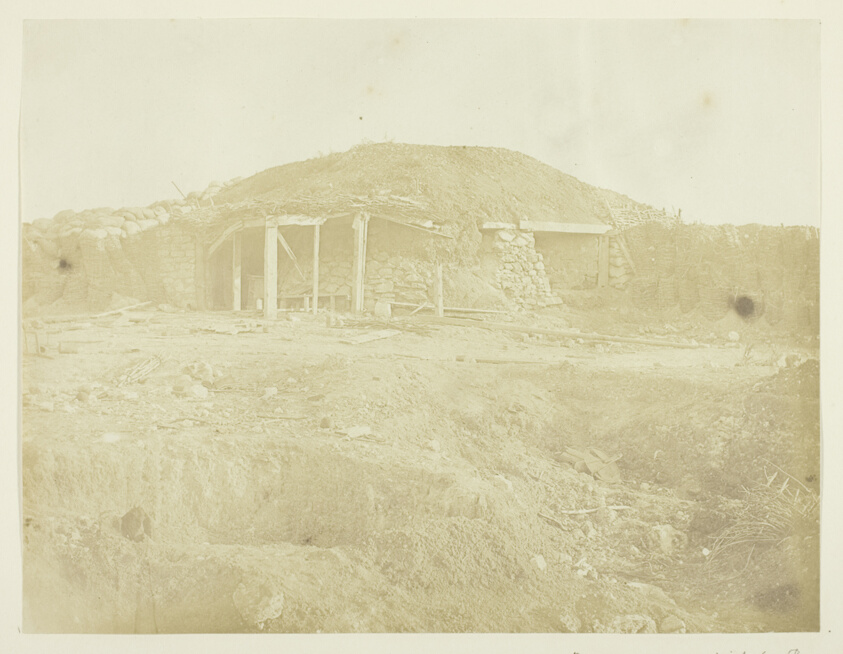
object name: Photograph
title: Bomb-Proof in which the Russian General lived who Commanded in the Redan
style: 19th century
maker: James Robertson (Scottish, c. 1813–d. after 1881)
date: 1855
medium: Albumen print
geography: Scotland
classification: unidentified; photography; photograph